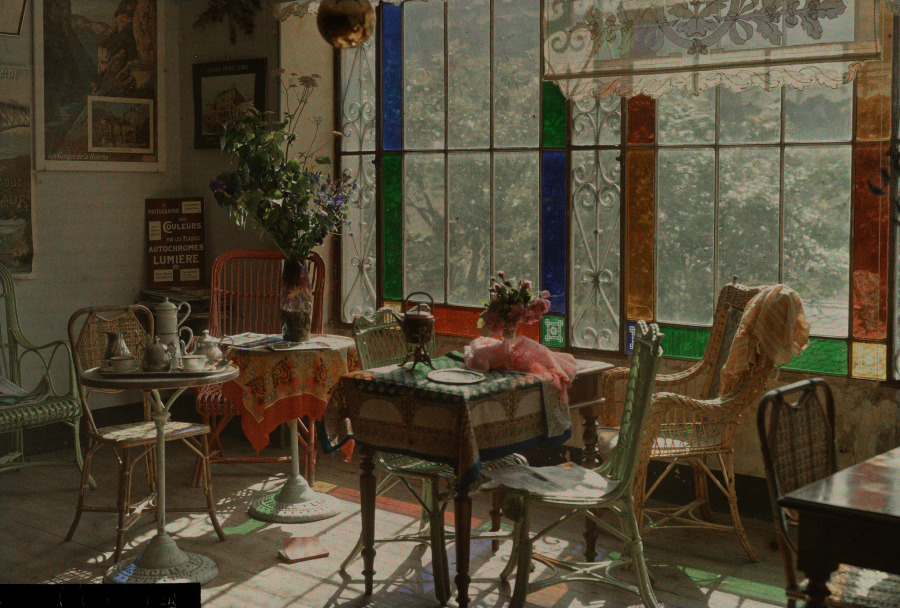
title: Blind Men from the Quinze Vingts, Walking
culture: France, 19th century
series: Scenes of Paris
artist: Jean Henri Marlet (French, 1770–1847)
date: 1820s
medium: lithograph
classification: Print